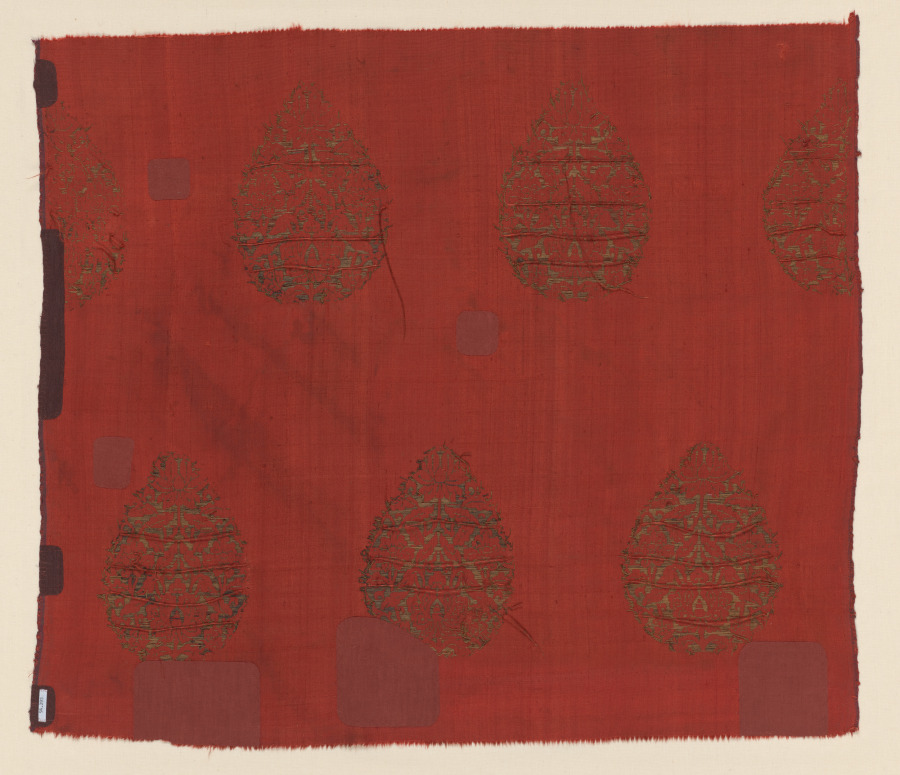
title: Brocade with Lotus Flowers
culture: Northern China, Yuan dynasty (1271-1368)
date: 1200s–mid-1300s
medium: Silk: tabby, brocaded; gold thread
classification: Textile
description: The tradition of brocade weaving in northern China continued after the Mongol conquest. However, the arrival of eastern Iranian craftsmen affected both the design and the structure of the brocades: patterns became symmetrical and paired warps replaced single warps. Both of these modifications can be observed in this example. At the same time, however, the Jin tradition of floating foundation wefts across the back sides of the brocaded areas continued. Brocades such as this may have been woven in Hongzhou (in Hebei province), where weavers from both western Asia and from the former Jin capital, Bianjing, are known to have worked together.